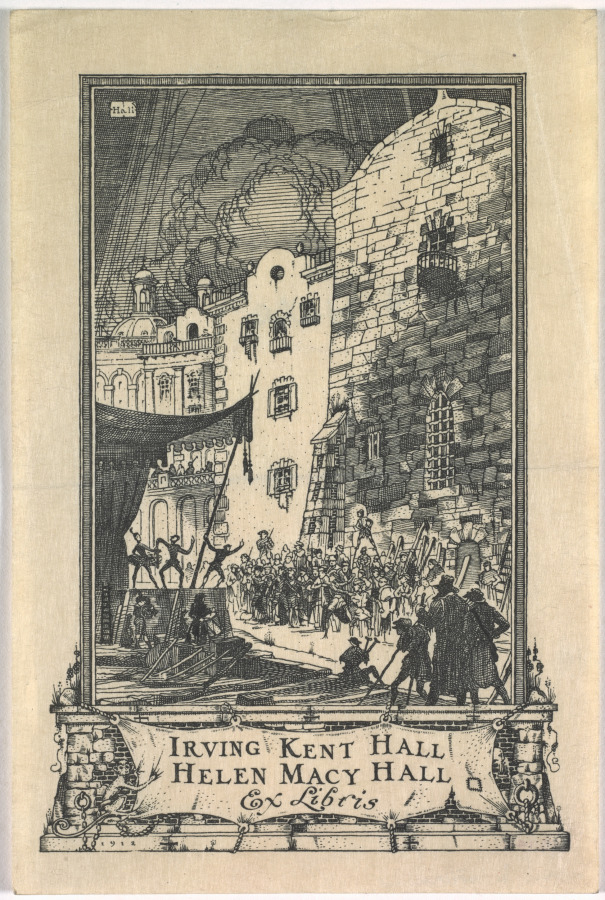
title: Bookplate: Irving Kent Hall and Mary Kent Hall, Ex Libris inscribed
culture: America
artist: Frederick Garrison Hall (American, 1879–1946)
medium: engraving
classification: Print